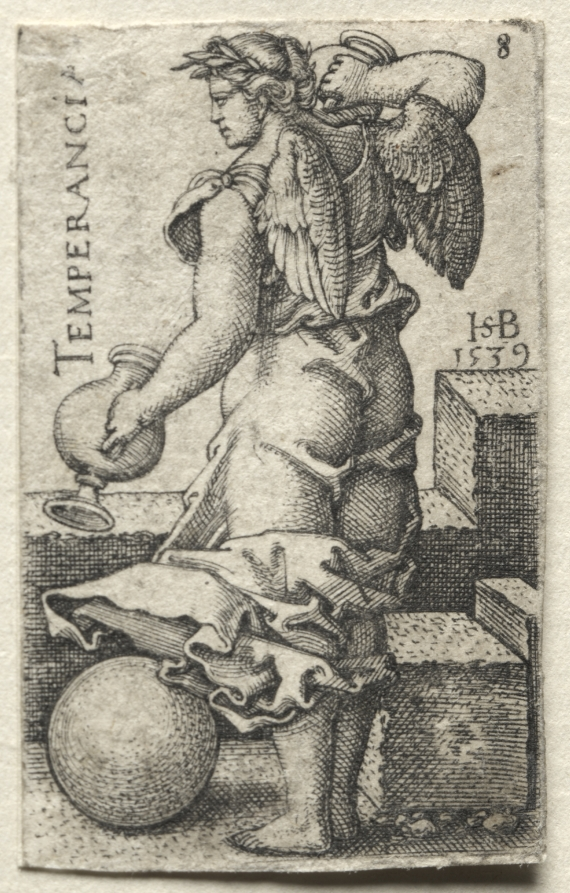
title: The Knowledge of God and the Seven Cardinal Virtues: Temperance - Temperancia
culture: Germany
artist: Hans Sebald Beham (German, 1500–1550)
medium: engraving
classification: Print